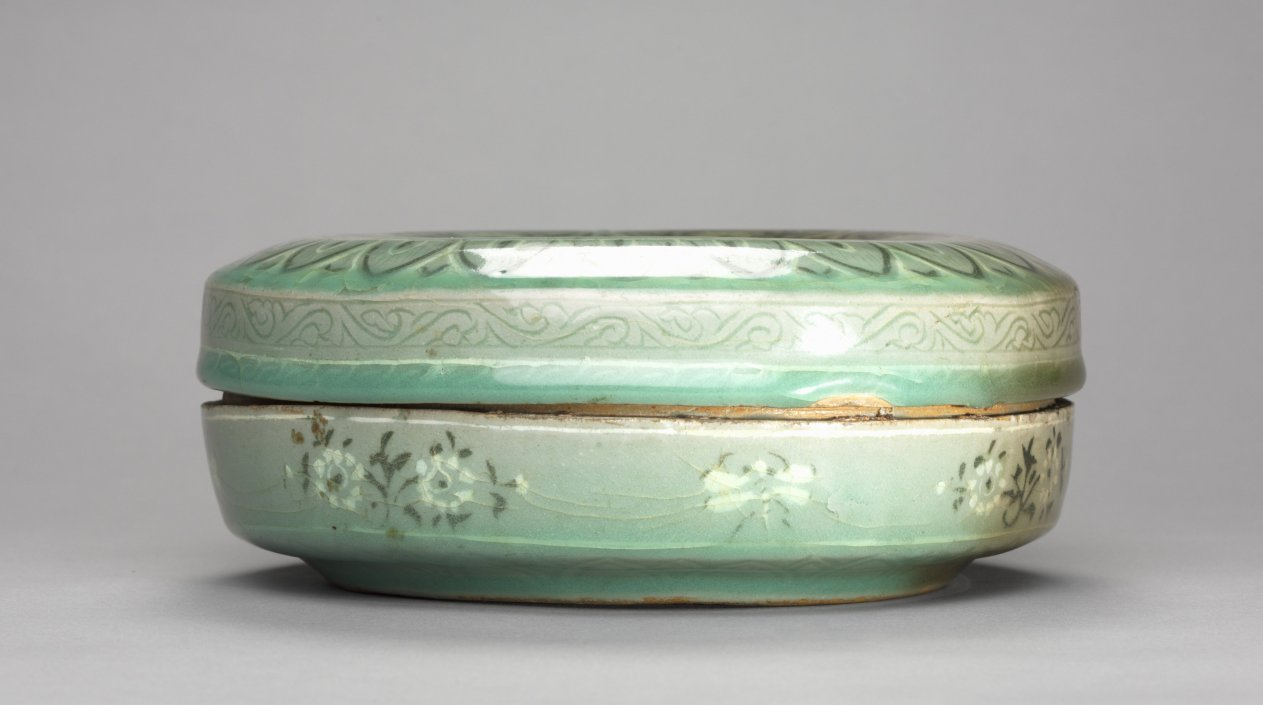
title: Box and Cover with Inlaid Phoenix Design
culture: Korea, Goryeo dynasty (918–1392)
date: 918–1392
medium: earthenware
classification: Ceramic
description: Celadons, spoons, seals, and bronze mirrors were the most common burial objects in tombs during the Goryeo period (918–1392). Once used to contain colored powder, rouge, and eyebrow gel for makeup, this small container was one of the standard goods that furnished elites' tombs. Both women and men used the grain powder of rice or millet for whitening their skin, safflower extract for rouge, and plant ash or soot for eyebrow gel. Yet, natural-looking makeup seems to have been the most favorable one in Korea according to the travelogue by Xu Jing (1091–1153), the Chinese diplomat who visited Korea in 1123.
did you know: This lidded ceramic container was used to store either incense or cosmetics.